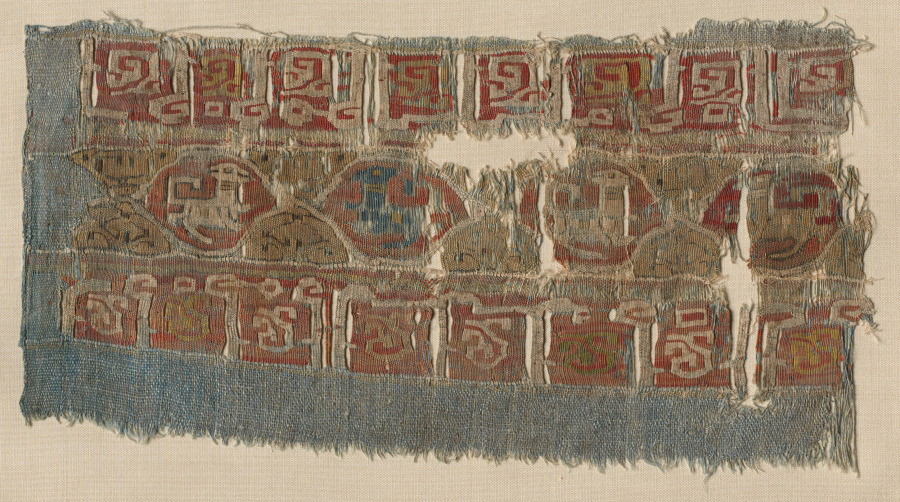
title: Fragment of a Tiraz-Style Textile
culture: Egypt, Fatimid period, Caliphate of al-Mustansir, 1000s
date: 1081–94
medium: tabby ground with inwoven tapestry ornament; linen and silk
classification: Textile